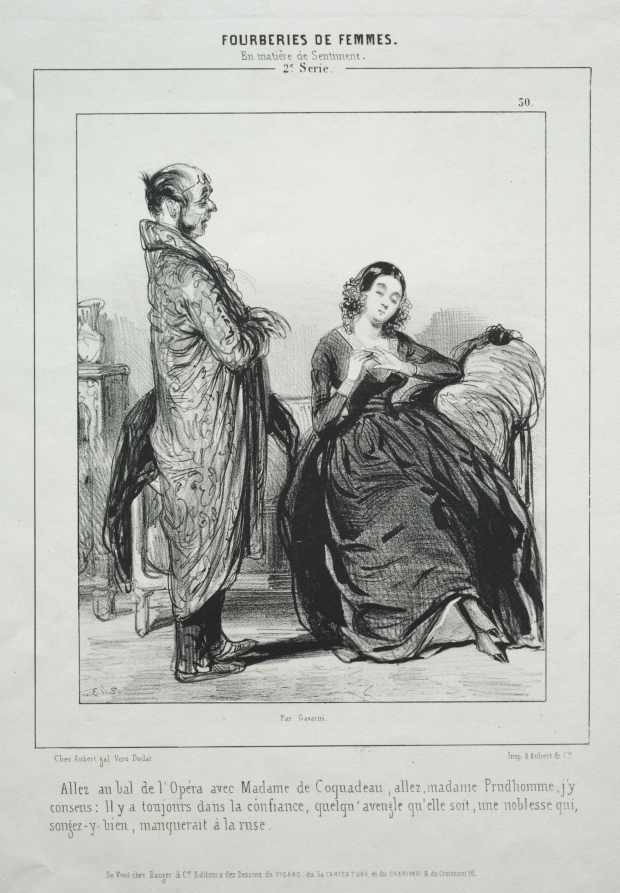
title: Fourberies de Femmes En Matière de Sentiment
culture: France, 19th century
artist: Paul Gavarni (French, 1804–1866)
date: 1837–41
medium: lithograph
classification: Print